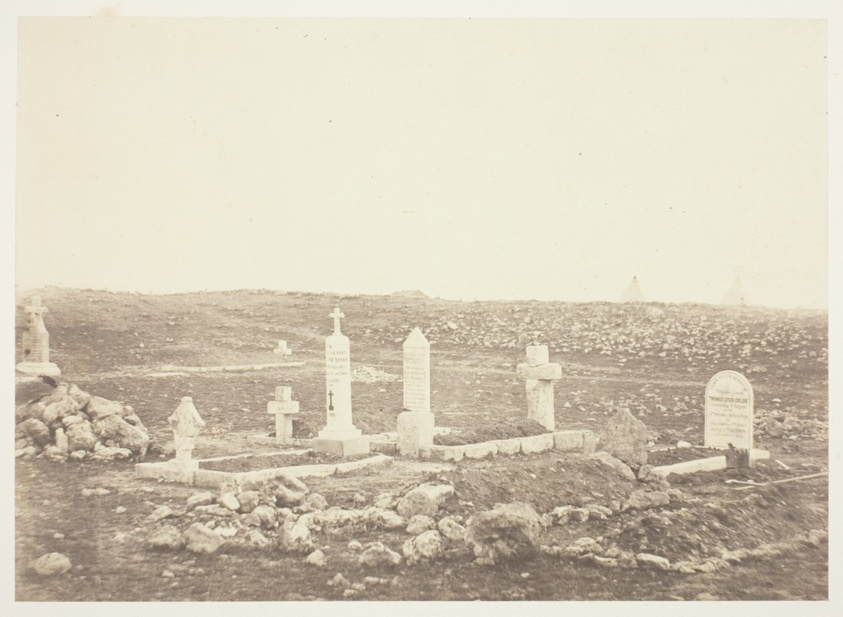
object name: Photograph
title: Cemetery, Cathcart's Hill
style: 19th century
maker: Roger Fenton (English, 1819–1869)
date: 1855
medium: Salted paper print, from the album "Photographic Pictures of the Seat of War in the Crimea" (1856)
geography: England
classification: salted paper print; photographic process; photography; photograph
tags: Collected by Hugh Edwards